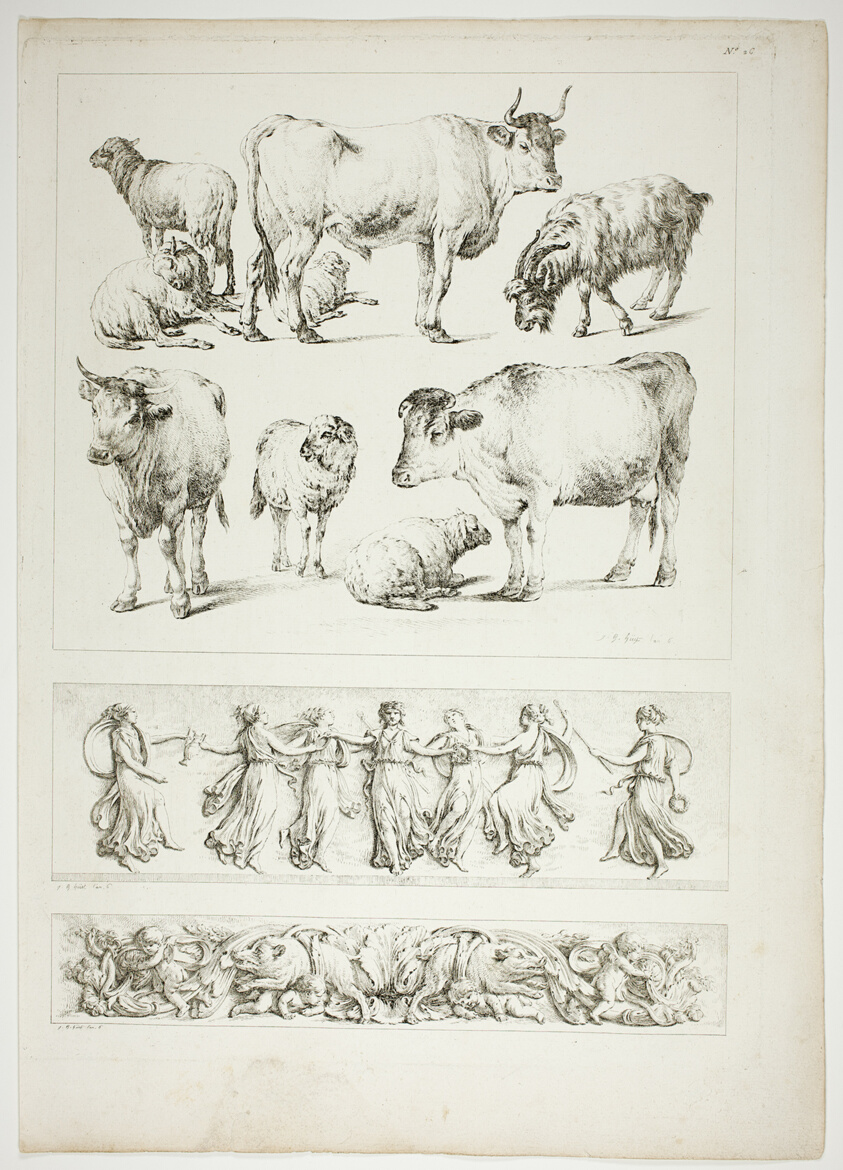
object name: Print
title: Plate 26 of 38 from Oeuvres de J. B. Huet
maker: Jean Baptiste Huet (French, 1745-1811)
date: 1796–99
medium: Etching on paper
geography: France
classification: etching; print; prints and drawing